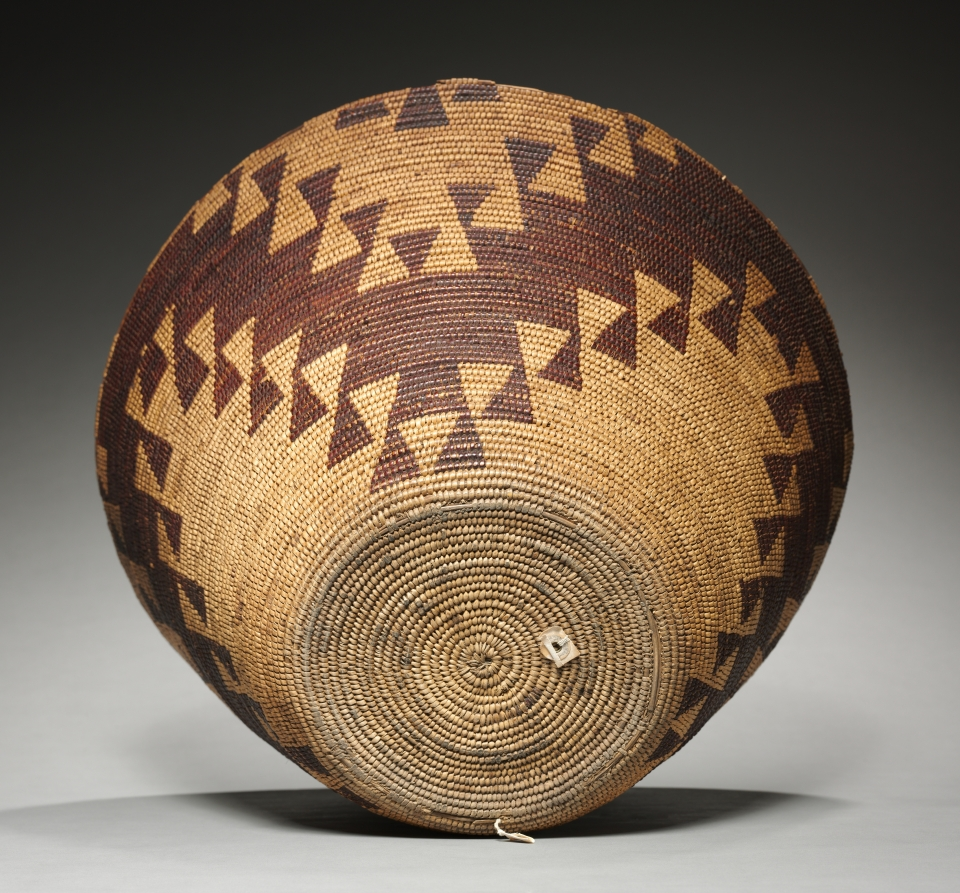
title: Cooking Bowl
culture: California, Maidu, Southern (Nisenan), Unassigned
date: Unassigned, before 1917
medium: redbud, coiled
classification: Basketry